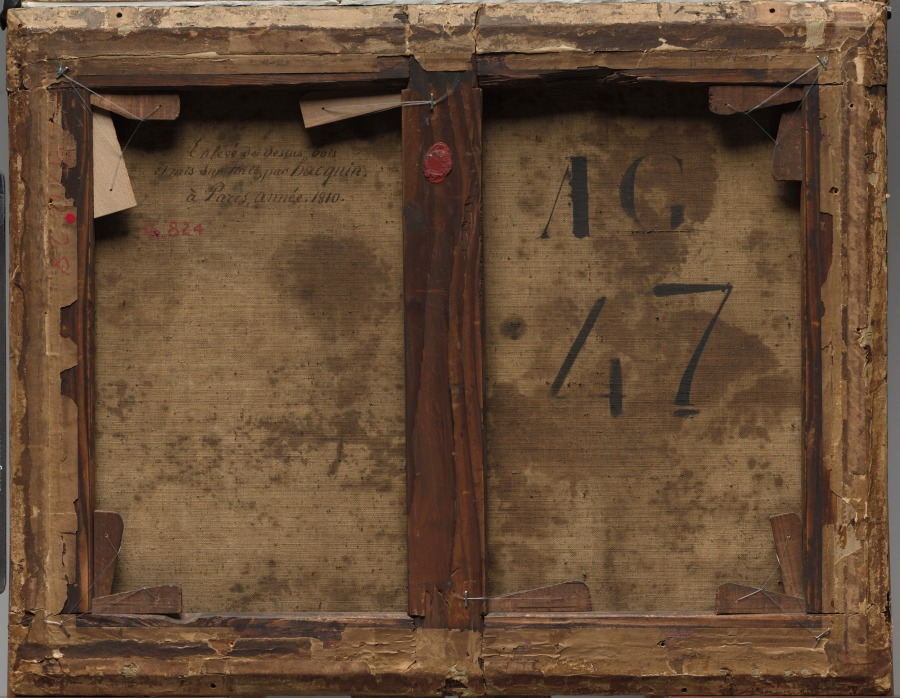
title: Salome with the Head of Saint John the Baptist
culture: Italy, Milan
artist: follower of Bernardino Luini (Italian, c. 1480-c. 1532)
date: 1500s or later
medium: oil on canvas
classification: Painting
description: Salome’s dancing so pleased her stepfather Herod that he offered her anything she wanted. Her mother advised Salome to demand John the Baptist’s head, which Salome presented to her family on an elaborate dish. Despite its biblical source, this work was meant for a domestic setting, whose owner would have admired the elegant presentation of a shocking story.